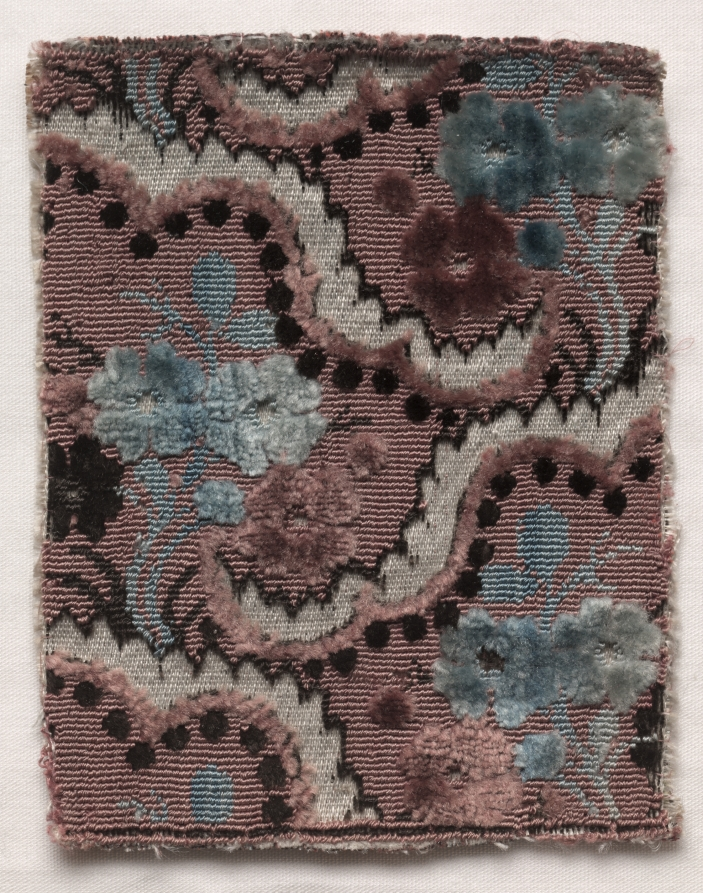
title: Textile Fragment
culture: France, late 18th century, Period of Louis XVI (1774-1793)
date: 1774–1793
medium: velvet (cut and uncut), on a white satin ground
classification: Velvet